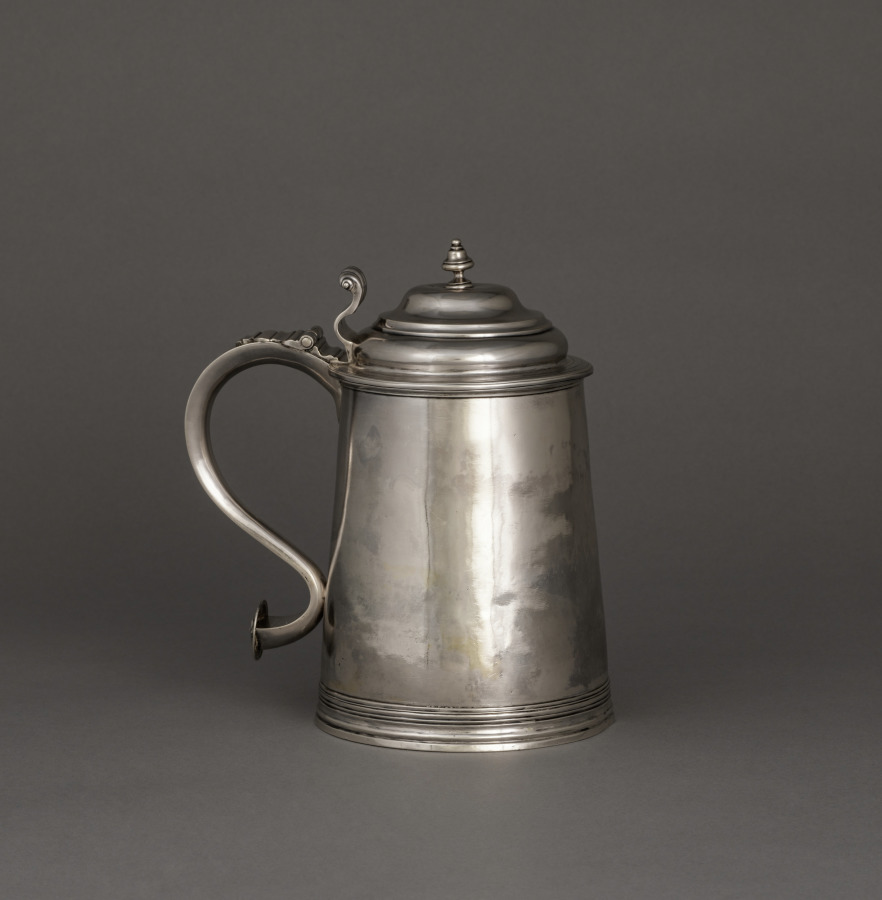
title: Tankard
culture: America, Rhode Island, Exeter and South Kingston, 18th century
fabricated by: Samuel Casey (American, c. 1724–c. 1780)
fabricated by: Thomas Arnold (American, 1734–1828)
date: c. 1750–1770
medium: silver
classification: Silver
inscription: engraved "G" over "W * I" in block letters on top of handle.